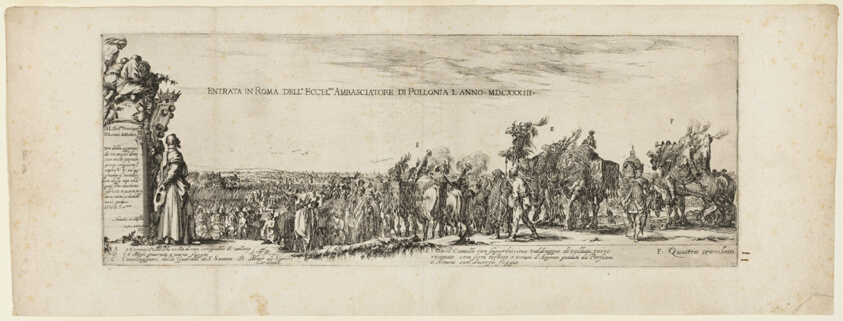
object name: Print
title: Plate One, from Entrance of the Ambassador of Poland into Rome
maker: Stefano della Bella (Italian, 1610-1664)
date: 1633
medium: Etching on ivory laid paper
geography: Italy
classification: etching; print; prints and drawing